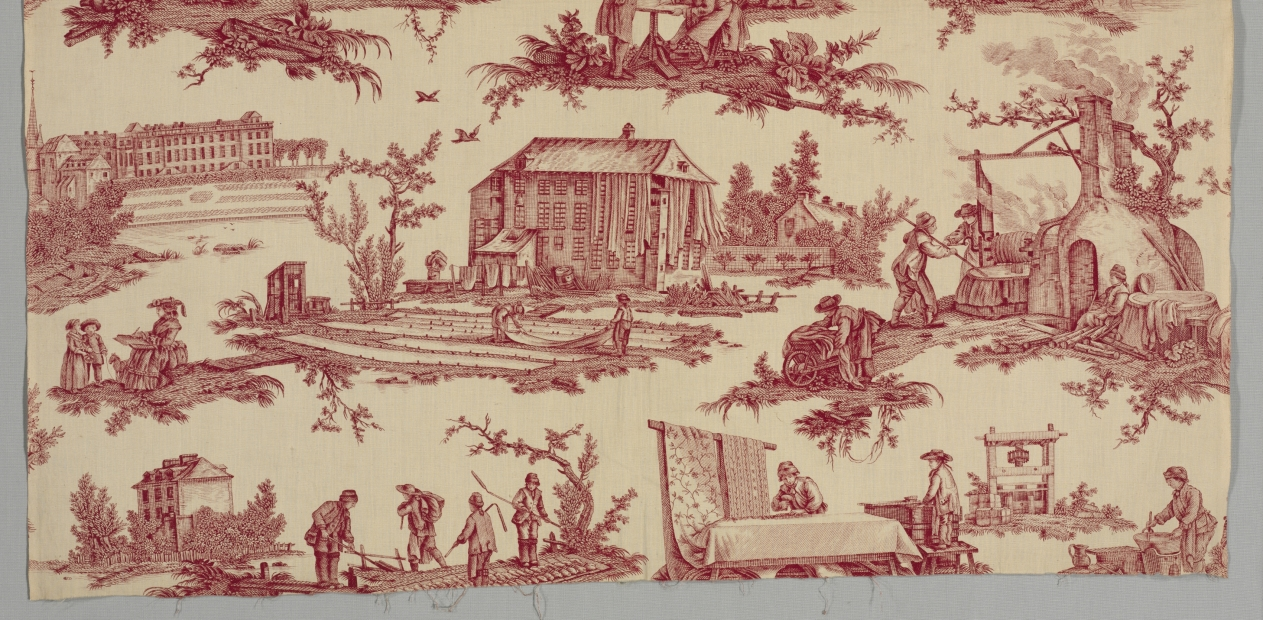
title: Les Travaux de la Manufacture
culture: France, Late 18th century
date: c. 1790s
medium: plain weave cotton, printed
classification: Textile